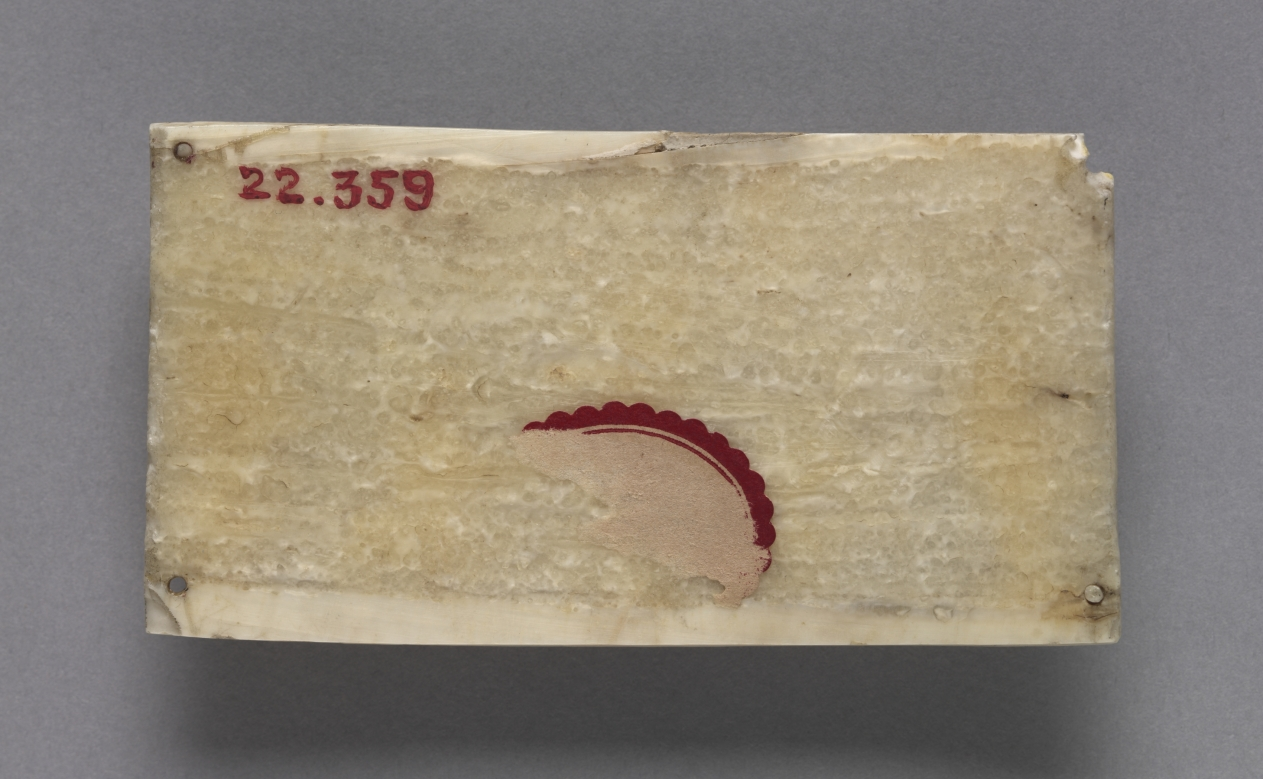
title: Plaque from a Portable Altar Showing the Crucifixion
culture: Germany, Lower Rhine Valley, Romanesque period, 11th century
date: 1050–1100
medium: walrus ivory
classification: Ivory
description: These intricately carved ivory panels once decorated the sides of a portable altar. Three of the plaques, those depicting Christ in Majesty and his apostles, were the first major acquisition of William M. Milliken, the museum's first curator of decorative arts and later director (1930–58). They were purchased from Emile Rey, the New York partner of Arnold Seligmann, Rey and Company, who had been closely associated with J. P. Morgan, Henry Walters, and other important American collectors. The fourth plaque, depicting the Crucifixion, was donated by Arnold Seligmann, Rey and Company later the same year. As Milliken later recalled, the pieces Rey showed him "were immensely intriguing, monumental in scale, even if tiny in size, the Christ in the Mandorla could have been enlarged and would have graced the tympanum of a great cathedral. . . . These morse [that is, walrus] ivories overwhelmed me . . . Somehow they must come to Cleveland. How was the question. Yet they would and must."